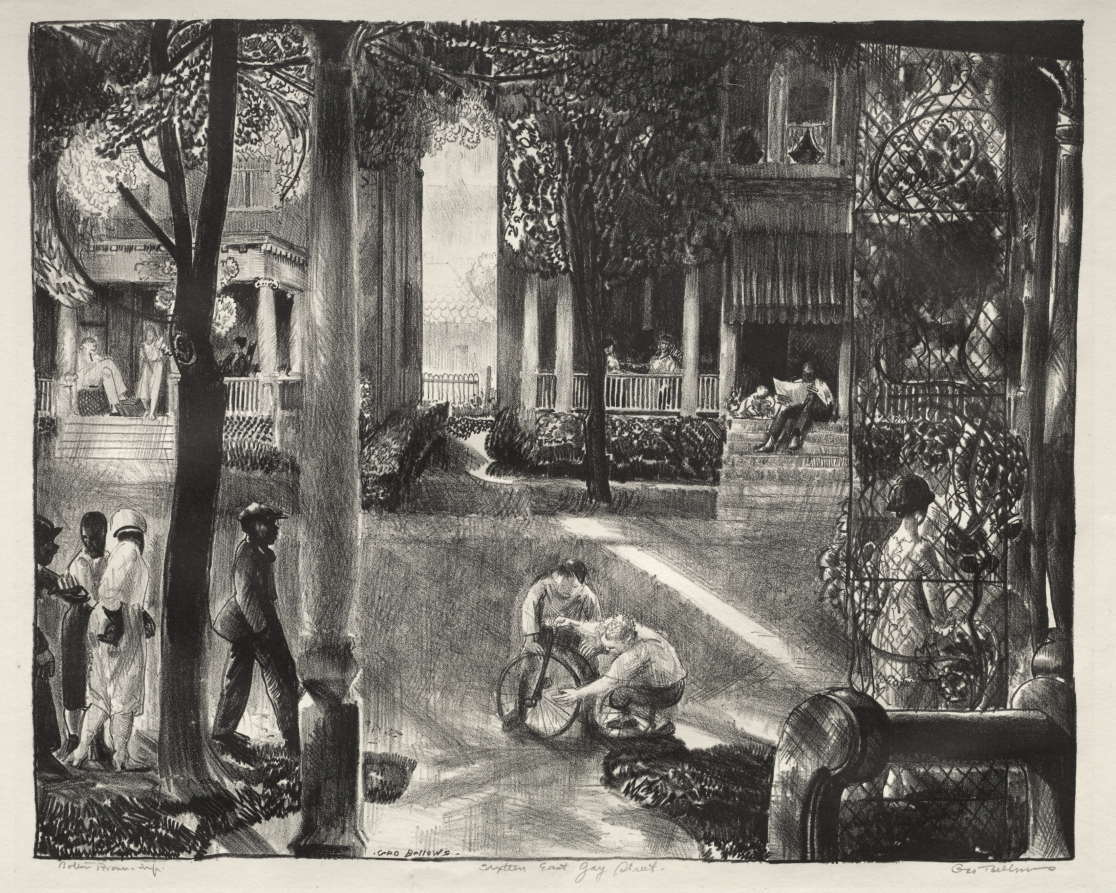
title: Sixteen East Gay Street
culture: America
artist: George Bellows (American, 1882–1925)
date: 1924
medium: lithograph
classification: Print